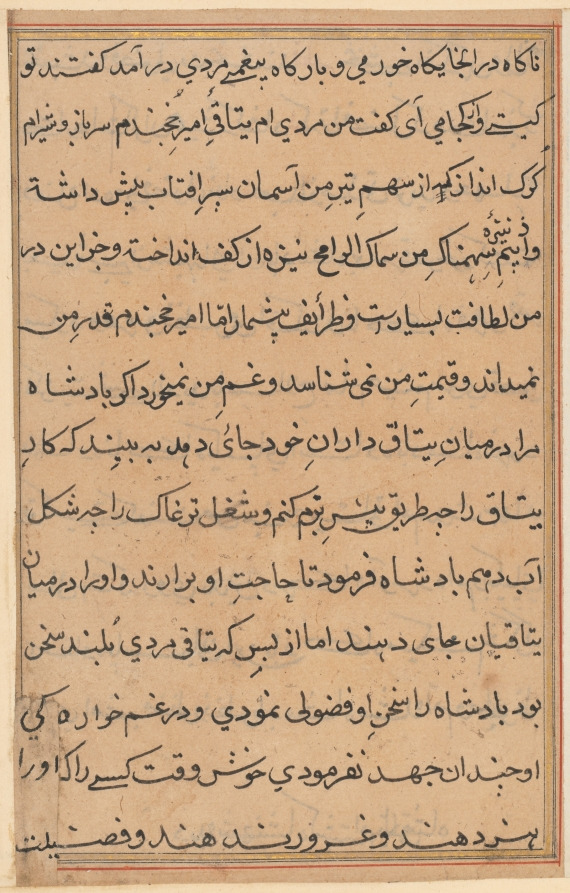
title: Page from Tales of a Parrot (Tuti-nama): text page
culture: Mughal India, court of Akbar (reigned 1556–1605)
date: c. 1560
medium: gum tempera, ink, and gold on paper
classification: Painting